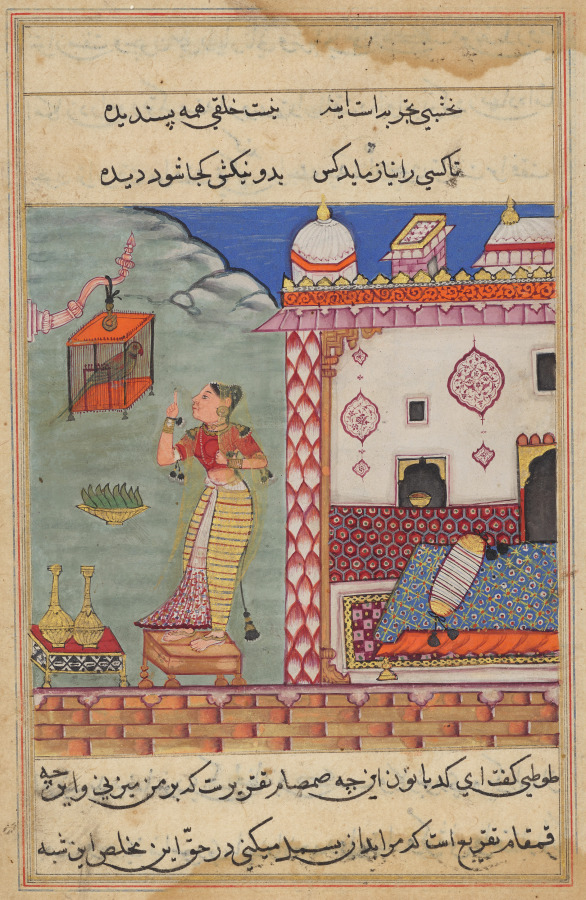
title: The Parrot Addresses Khujasta at the Beginning of the Twenty-seventh Night, form a Tuti-nama (Tales of a Parrot)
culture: Mughal India, court of Akbar (reigned 1556–1605)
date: c. 1560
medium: gum tempera, ink, and gold on paper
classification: Painting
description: Khujasta prepares herself each night to secretly meet her new lover, but before she is able to leave, her pet parrot Tuti cleverly entices her to stay with the tantalizing beginnings of a story. Tuti’s telling of the story takes all night, and by the time he reaches the end, it is too late for her rendezvous. A bowl of paan, areca nuts wrapped in betel leaves, has been set out for chewing, freshening breath, and its various pleasurable effects.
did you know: Khujasta has been drinking wine—evidenced by the bottles on the low table before her.